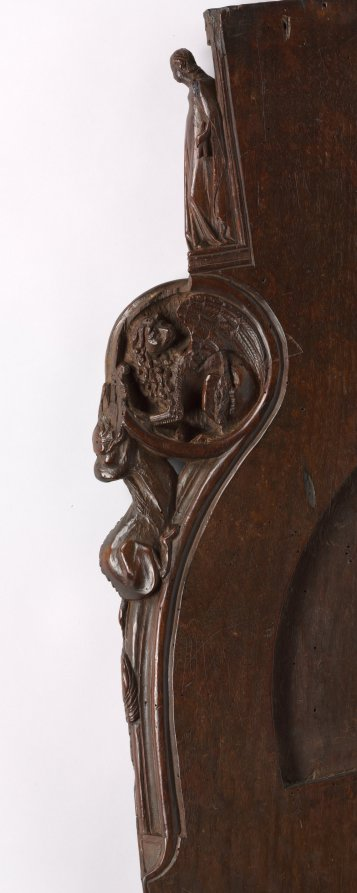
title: Panel from a Choir Stall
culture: Spain, Catalonia, Monastery of Pedralbes, 14th century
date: c. 1330–1340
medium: walnut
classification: Furniture and woodwork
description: The smaller panel here originated from an interior portion of a choir stall. The panel depicts a female figure in a long gown standing on a plinth above two of the apocalyptic beasts, the winged lion of Saint Mark and the winged ox of Saint Luke, which are supported by a wyvern (a heraldic winged dragon).